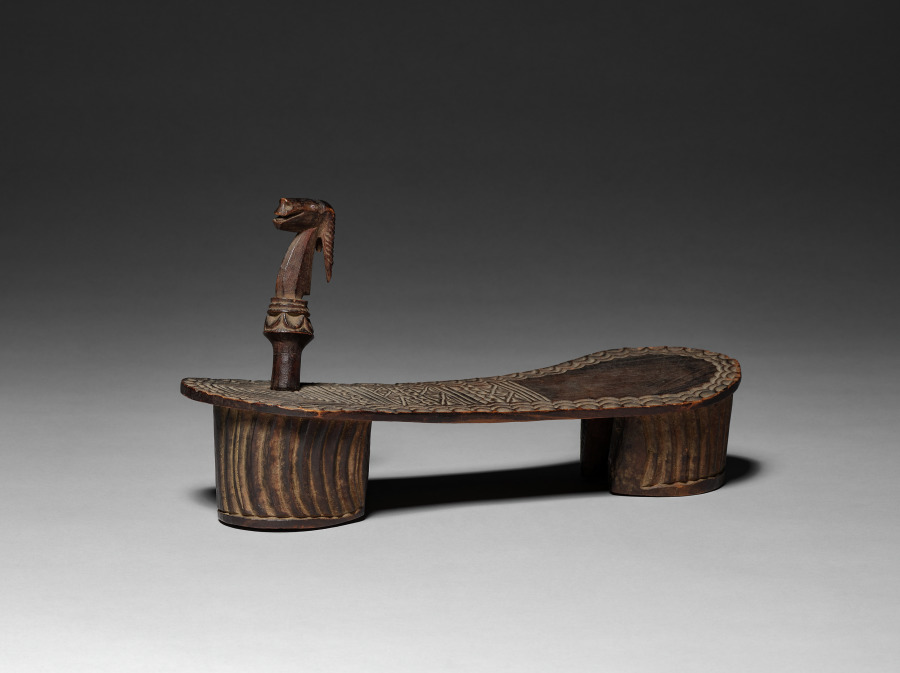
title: Sandal (mtalawanda / mtawanda) or Clog (kiatu cha mti)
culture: Africa, Central Africa, Democratic Republic of Congo, unidentified carver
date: c 1800s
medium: Wood and glass beads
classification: Wood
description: Common in the Indian Ocean region, wooden sandals changed meaning across place and time. This pair’s base elevates the foot as the toes grip an antelope-shaped peg (msuruaki). Crisp geometric sole designs suggest they were rarely worn. East African elites and merchants once had exclusive rights to wooden shoes, wearing elaborate ones only for portraits. Formerly enslaved people living along the coast wore simpler ones from the 1840s onward, adopting elite footwear to assert their liberation. However, slave traders like the Zanzibari “Tippu Tip” (c. 1832–1905) likely brought mitalawanda to Central Africa; stylistic elements of this pair hail from that region.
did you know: This distinctive footwear traveled from Southeast Asia and the Middle East to Africa, first to the Swahili Coast and then further inland to parts of Central Africa. The deity Krishna wears similar shoes (paduka) in an eighteenth-century Indian miniature painting (2003.344).